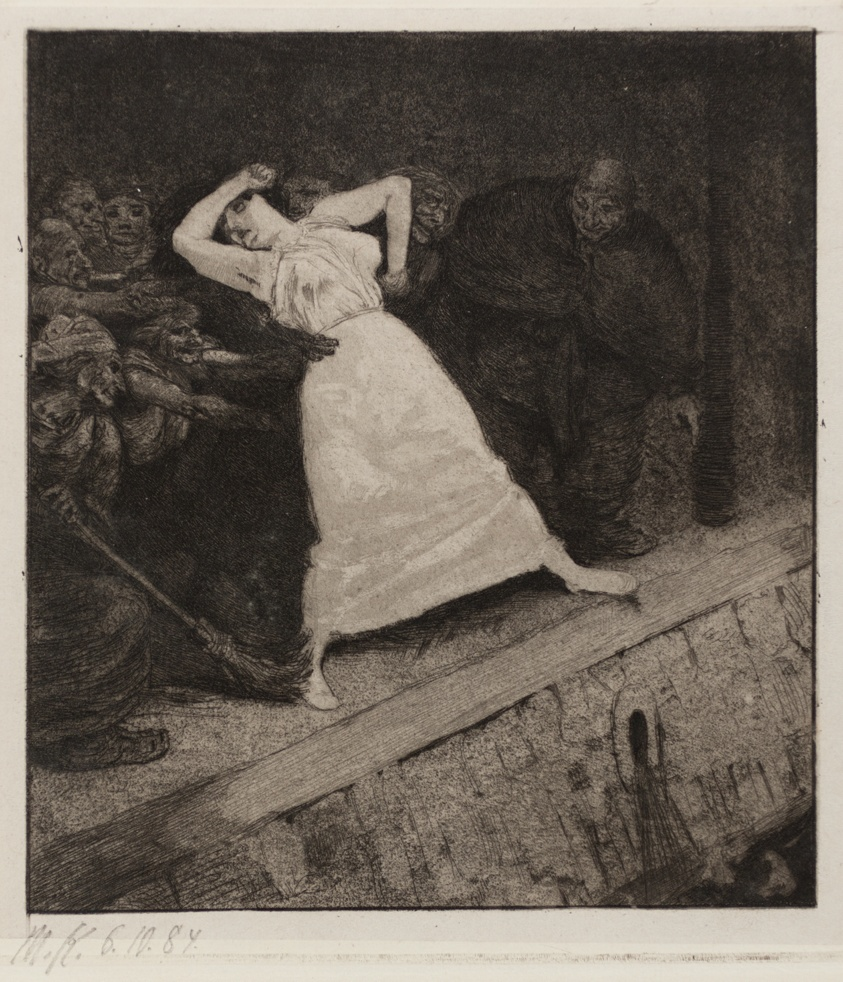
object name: Print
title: Into the Gutter!, plate ten from A Life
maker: Max Klinger (German, 1857-1920); printed by Otto Felsing (German, 19th century)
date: 1884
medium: Etching and aquatint, with stipple on ivory China paper, laid down on cream laid paper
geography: Germany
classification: etching; print; prints and drawing